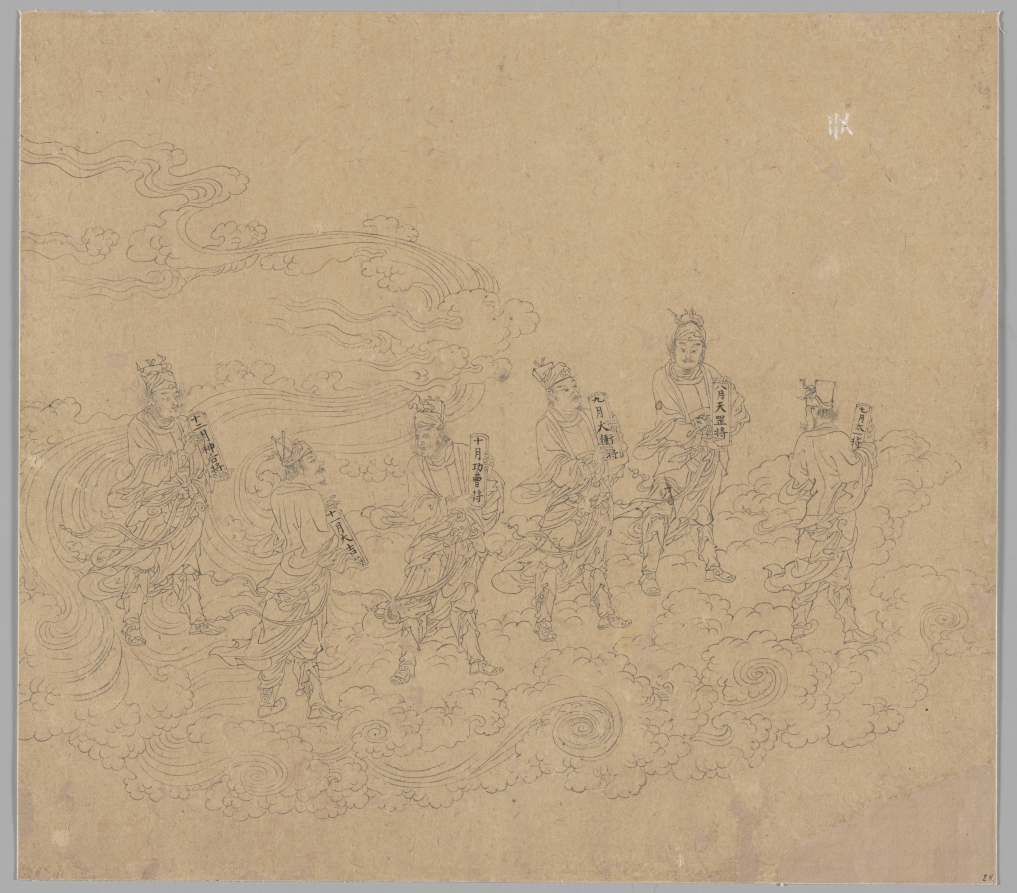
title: Album of Daoist and Buddhist Themes: Procession of Daoist Deities: Leaf 24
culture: China, Southern Song dynasty (1127-1279)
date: 1200s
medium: Album, ink on paper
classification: Painting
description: These six Daoist deities all carry plaques inscribed with their names. This leaf continues the series of half-officers for the seventh through twelfth months, ordered from right to left. Album leaf 23 has the six half-officers for the first to the sixth month of the cycle.